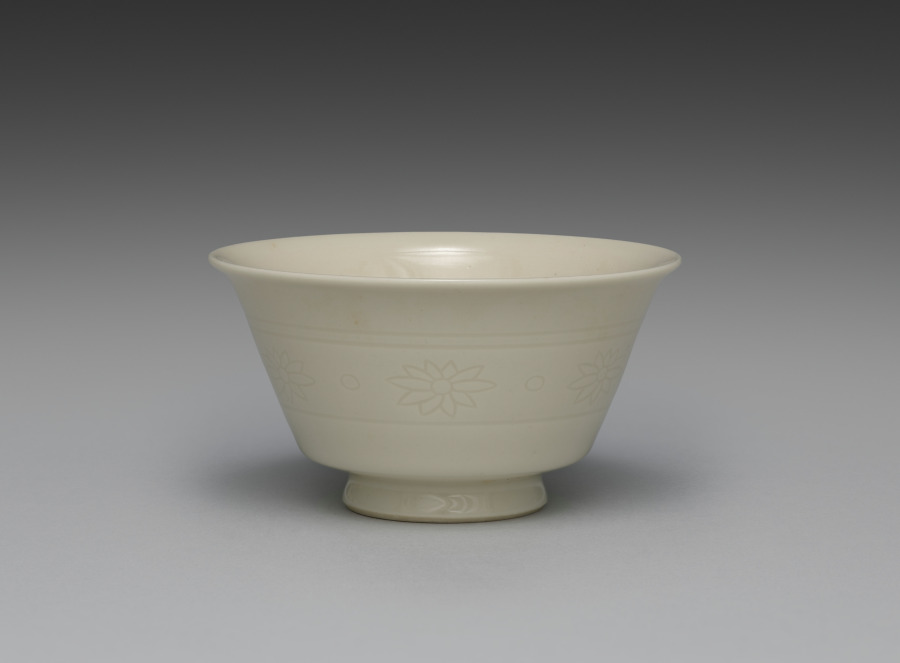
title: Teacup from Teacups with Floral Band Motif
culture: Japan, Meiji period (1868–1912)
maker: Seifū Yohei III (Japanese, 1851–1914)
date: 1893–1914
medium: One from a set of five cups; porcelain with incised decoration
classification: Ceramic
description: The five sencha teacups in this set are decorated with incised flowers and dots between a double band at the top and a single band at the bottom. They are in Yohei III’s creamy taihakuji body and glaze. In their motifs, they are quite similar to an incense burner by Yohei III (see CMA 2022.180), but the flowers are even more simple in design, with no open circle at the center. A label affixed to the side of the box refers to them as “sencha cups in emulation of Korean white [ware].” The reference to Korean ware indicates that even though Yohei was more directly inspired by Qing-dynasty wares from the Dehua kilns in Fujian Province in developing his porcelain clay and glaze for works such as these, the general understanding of the continental models still placed them, at least in terms of color, among pieces broadly associated in Japan with Korean white wares. The delicate cups are thinly potted, so they have a highly desirable translucency.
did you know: The delicate cups in this set are thinly potted, so they have a highly desirable translucency.